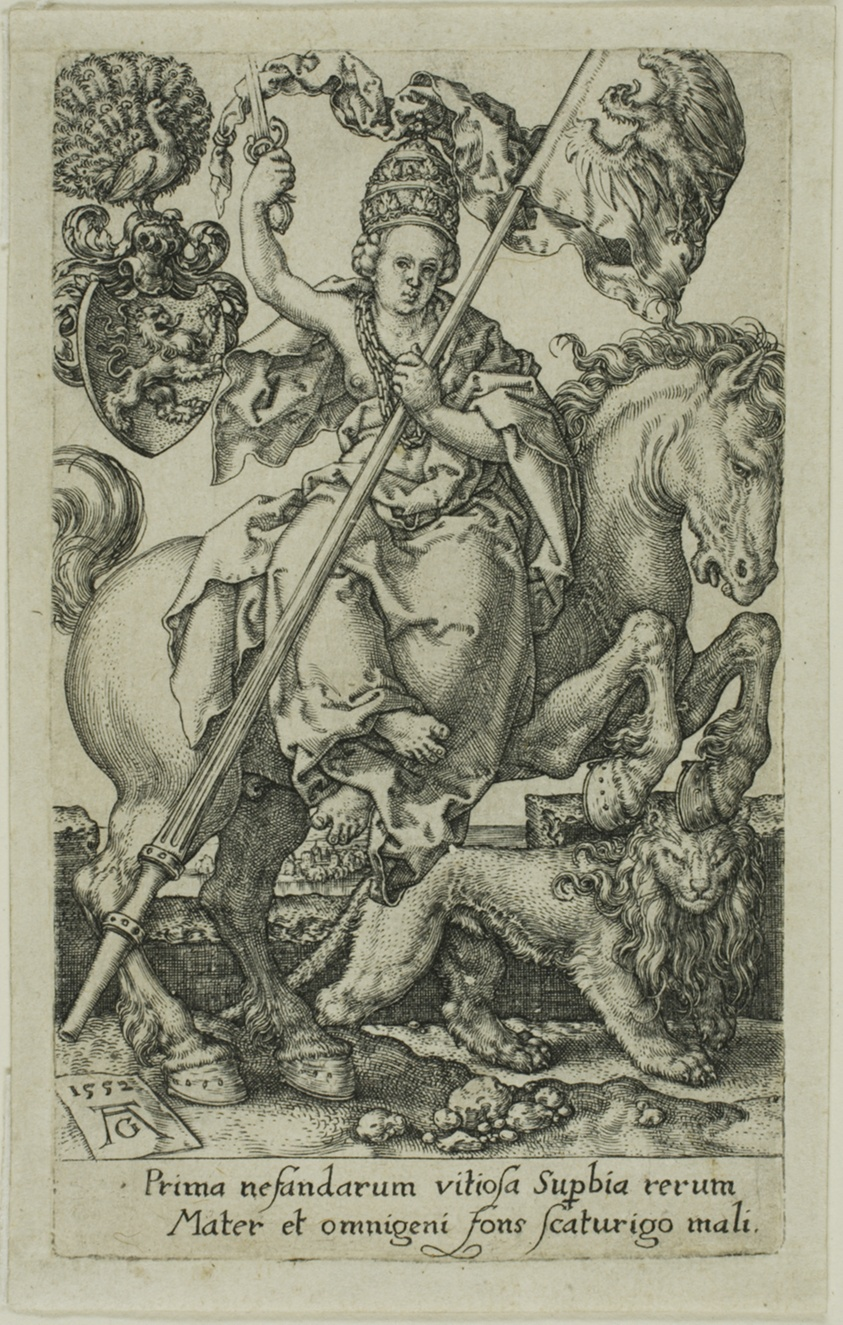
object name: Print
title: Pride, from the Vices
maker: Heinrich Aldegrever (German, 1502-c.1560)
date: 1552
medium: Engraving in black on ivory laid paper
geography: Germany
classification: engraving; print; prints and drawing